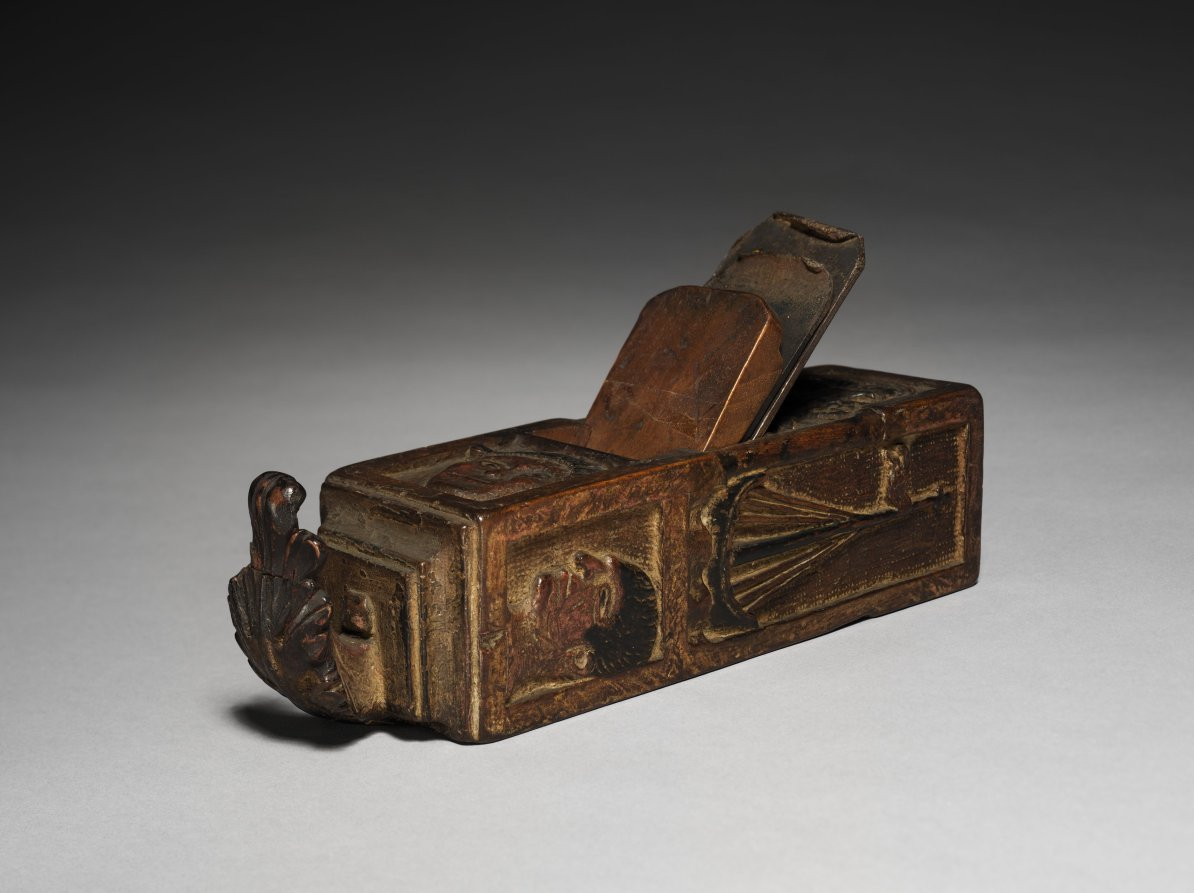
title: Carpenter's Plane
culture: Italy, late 16th century ?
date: late 1500s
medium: wood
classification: Tool